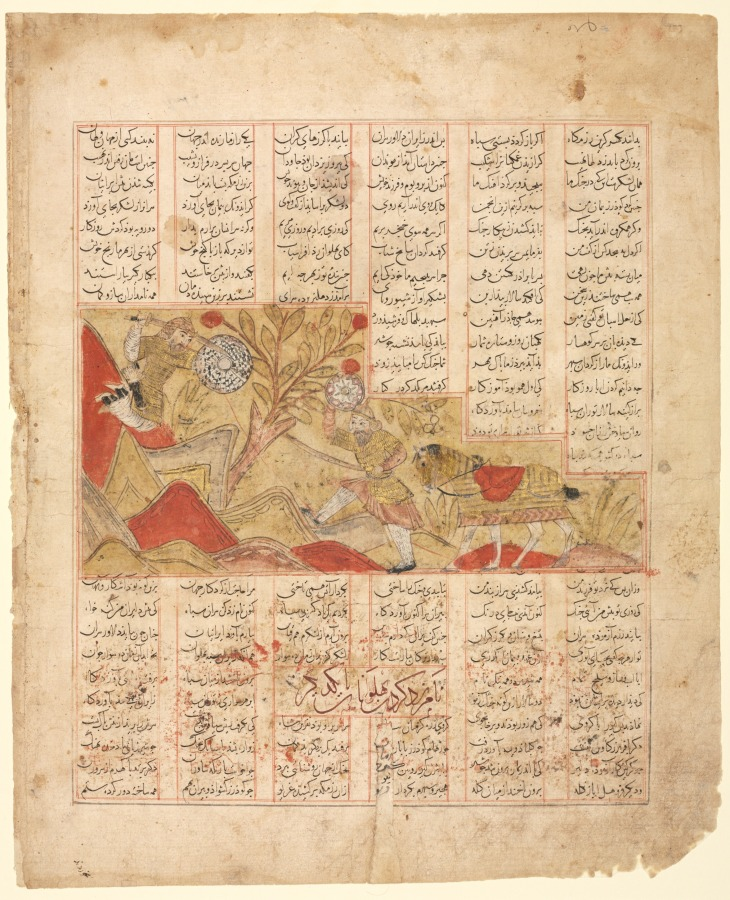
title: The Tale of the Twelve Faces. "Bizhan Addresses the Army": Illustration from the Firdausi Shahnama (recto); The Tale of the Twelve Faces. "The Warriors Engage in Combat": Illustration from the Firdausi Shahnama (verso)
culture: Iran, Shiraz, Inju (Il-Khanid), 14th Century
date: 1341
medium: opaque watercolor and ink on paper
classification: Manuscript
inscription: Script: Naskh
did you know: The combat scene is enclosed within a step-shaped frame.